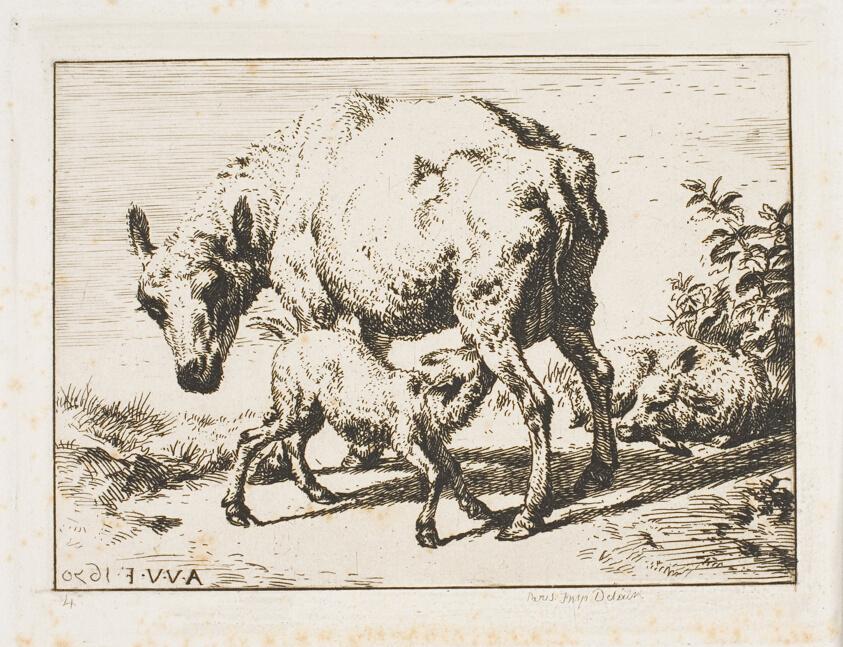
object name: Print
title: The Ewe with Two Lambs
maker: Charles Meryon (French, 1821-1868); after Adriaen van de Velde (Dutch, 1636-1672)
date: 1850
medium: Etching and engraving on ivory wove paper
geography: France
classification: etching; print; prints and drawing